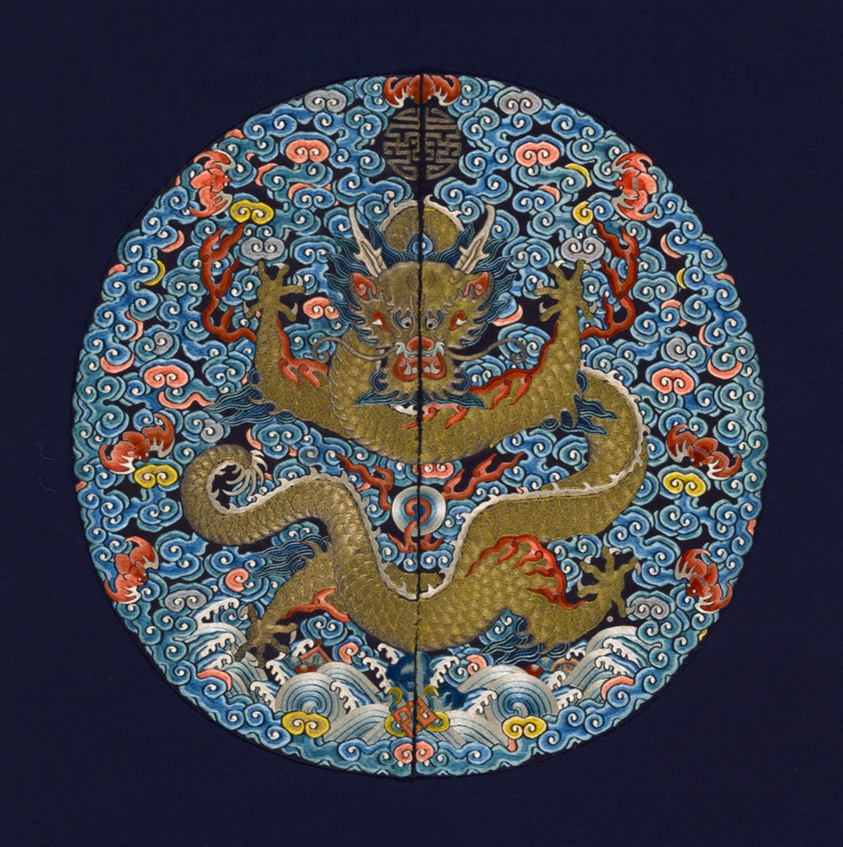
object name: Costume and Accessories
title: Buzi (Court Rank Badge)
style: qing, Chinese (culture or style), East Asian, asian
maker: Manchu (China)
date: 1825/50, Qing dynasty (1644–1911)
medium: Silk, warp-float faced 7:1 satin weave; embroidered with silk and gilt-metal-strip-wrapped silk in knot, satin, and stem stitches; laid work and couching; lined with silk, plain weave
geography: China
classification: textile; needlework (visual works); weaving; costume